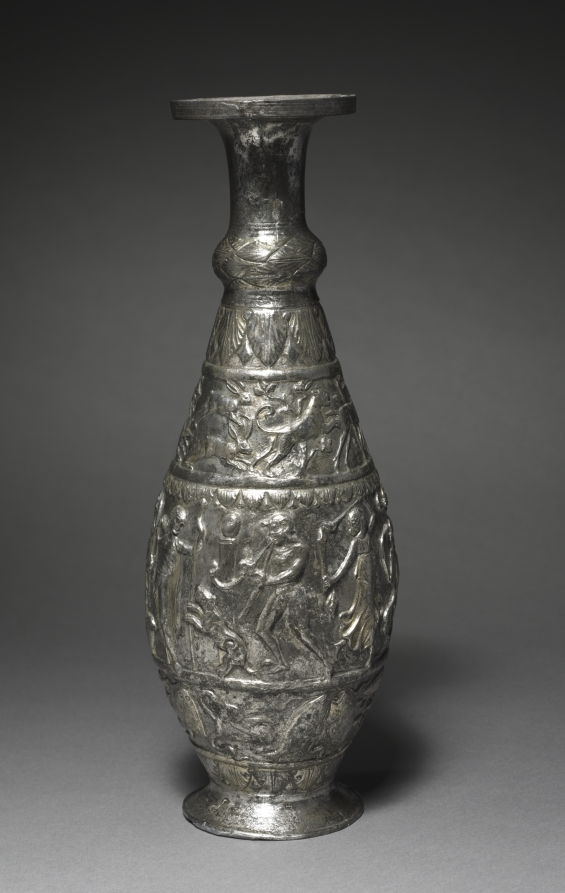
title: Ewer (Pitcher) with Game, Seafood, and Wine Scenes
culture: Byzantium, Syria(?), Byzantine period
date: late 300s CE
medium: silver with traces of gilding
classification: Metalwork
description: This magnificent pitcher, called a ewer, was almost certainly meant for serving wine in the dining room of a wealthy home. On its surface are images in three bands representing the expected bounty of the hunt. Deer pursued by a lioness and hares chased by dogs appear in the top band, signifying the wealth of game the owner hoped to have on the family table. In the lowest band are edible sea creatures, while the center features the merry followers of the Roman wine god Bacchus (Dionysos in Greek).